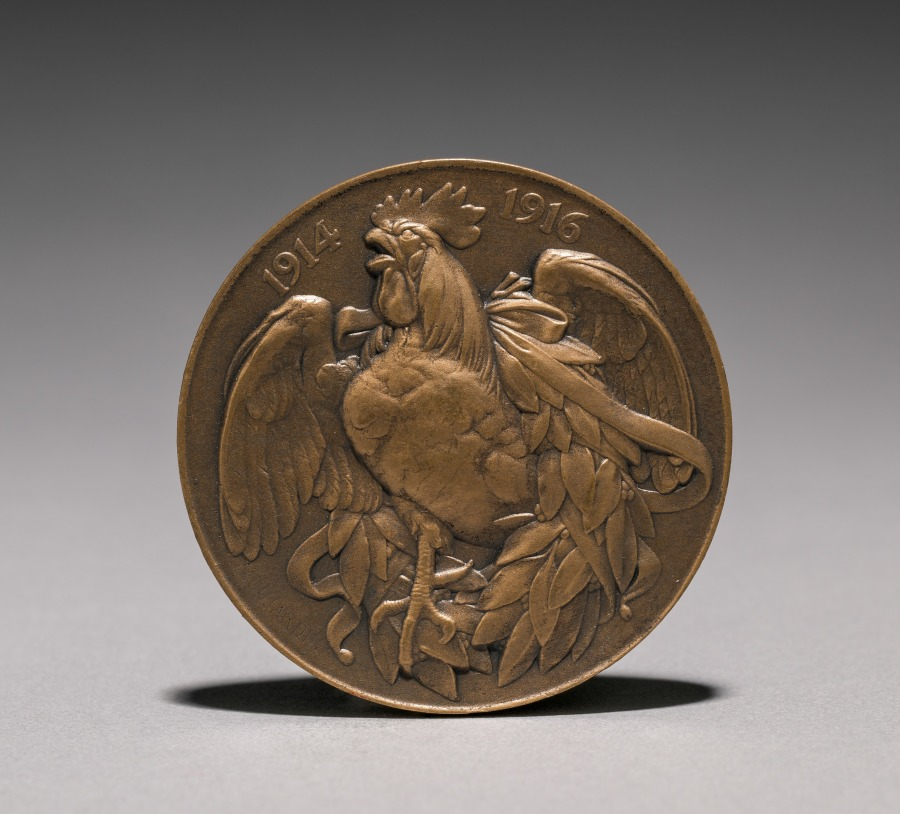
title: Medal (reverse)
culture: France, 20th century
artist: Auguste Dujardin (French, 1847–1918)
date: 1914–1916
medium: bronze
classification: Metalwork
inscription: "1914 1916."